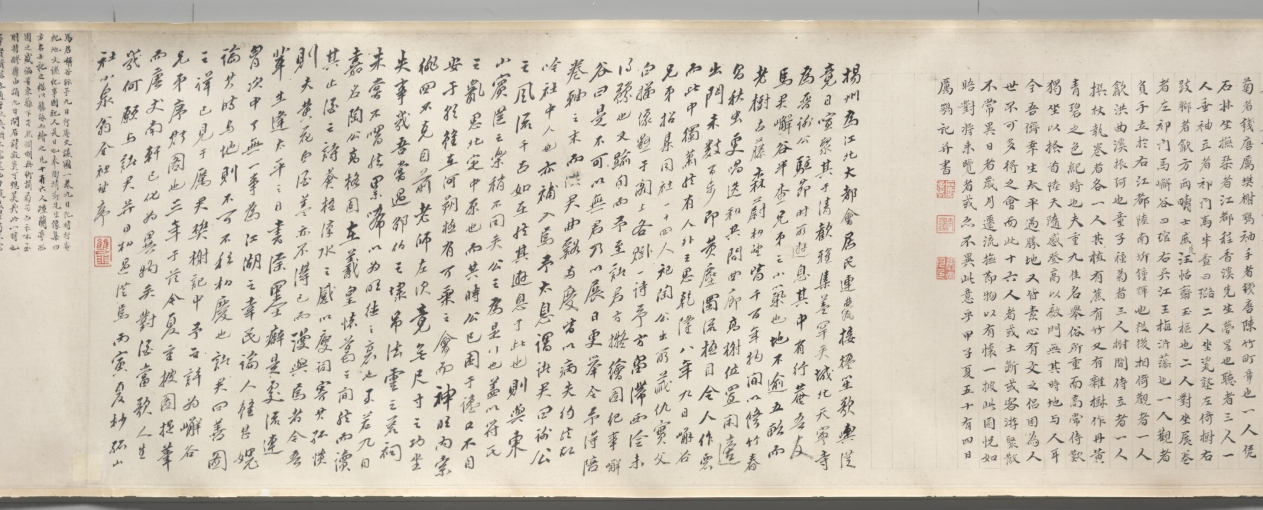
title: The Ninth Day Literary Gathering at Xing’an [Temporary Retreat]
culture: China, Qing dynasty (1644-1911)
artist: Fang Shishu (Chinese, 1693–1751)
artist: and Ye Fanglin (Chinese, active late 1600s–mid-1700s)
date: 1743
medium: Handscroll; ink and color on silk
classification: Painting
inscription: Fang Shishu's seal at beginning of painting: Ou ran shi de 偶然拾得. Ye Fanglin's seal at end of painting: Fanglin 芳林. Frontispiece title dated 1743 and 3 seals of Chen Bangyan 陳邦彦 (1678-1752).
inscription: 行庵在揚州北郭天寧寺西隅，馬君嶰谷半槎兄弟購僧房隙地所築，以為游息之處也。寺為晉謝太傅別墅。西隅饒古木，䨴鬱陰森，入林最僻，不知其近郛郭。庵居其中，無斲礱髤采之飾，惟軒庭多得清蔭，來憩者每流連而不能去。乾隆癸亥九日，積雨既收，風日清美，遂約同人，咸集於斯，中縣［懸］仇英白描陶靖節像，采黃花，酌白醪為供，乃以人世難逢開口笑，菊花雖插滿頭歸分韻賦詩。陶陶衎衎，觴詠竟日。既逾月，吳中寫真葉君敬［震］初適來，群貌小像，合為一卷，方君環山補景，命曰九日行庵文讌圖。裝池成，將各書所作於後，而囑鶚為之記。記按圖中共坐短榻者二人：右箕踞者，為武陵胡復齋先生期恆；左抱膝者，為天門唐南軒先生建中也。坐繩床者二人：中手牋者，歙方環山士庶；左仰首如欲語者，江都閔玉井華也。一人坐藤塾捻髭者，鄞全謝山祖望也。一人倚石坐若凝思者，臨潼張漁川四科也。樹下二人：離立把菊者，錢唐厲樊榭鶚；袖手者，錢唐陳竹町章也。一人憑石床坐撫琴者，江都程香溪先生夢星也。聽者三人：一人垂袖立者，祁門馬半查曰璐；二人坐瓷塾，左倚樹、右跂腳者，歙方西疇士疌 、汪恬齋玉樞也。二人對坐展卷者，左祁門馬嶰谷曰琯，右吳江王梅沂藻也。一人觀者，負手立於右，江都陸南圻鐘輝也。從後相倚觀者一人，歙洪曲溪振珂也。童子種菊者三人：樹間侍立者一人，撰杖、執卷者各一人。其植有蕉、有竹，又有雜樹，作丹黃青碧之色，紀時也。夫重九佳名，舉俗所重，而高常侍歎獨坐而搔首，陸天隨感登高以剫門，無其時地與人耳。今吾儕幸生太平，遇勝地，又皆素心有文之侶，固人世不可多得之會；而此十六人者，或土斷，或客游，聚散不常。異日者，歲月遷流，撫節物以有懷，一披此圖，悅如晤對。將來覽者，或亦不異此意乎。甲子夏五十有四日厲鴞記並書。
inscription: 揚州為江北大都會，居民連甍接楹，笙歌輿從，竟日喧聚，其於淸歌雅集，葢罕矣。城北天寧寺，為晉謝公駐節時所游息，其中有行庵，吾友馬君嶰谷、半查兄弟之小築也。地不踰五畝，而老樹古藤，森蔚相望，皆千百年物，間以修竹，春鳥秋蟲，更唱迭和，其間曲廊高榭，位置閑適。出門未數百步，即黃塵濁流極目，令人作惡。而此中獨蕭然有人外之思。乾隆八年九日，嶰谷兄弟招集同社一十四人祀陶公，出所藏仇實父白描像懸於閣上，各賦一詩。予方留滯西泠，未得預也。又踰旬而予至，諸君方擬繪圖記事，嶰谷曰：是不可無君。乃以展日更舉，令予得陪卷軸之末；而洪君曲溪，兩度皆以病失約，然故吟社中人也，亦補入焉。予太息謂諸君曰：謝公之風流，千古如在；然其游息於斯也，則與東山賓從之樂稍不同矣。公之為是行也，蓋以符氏之亂，思北定中原也。而其時公巳困於讒口，不自安於朝；雖在河朔極有可乘之會，而神明內索，徘徊不克自前。老師左次，竟無尺寸之功，坐失事幾。吾常過邵伯之埭，吊法雲之荒祠，未嘗不喟然累啼，以為明德之衰也。至若九日嘉名，陶公高格，固在羲皇懷葛之間；然而讀其 止酒之詩，蒼梧漢水之感，以瘦詞寄其孤憤則夫黃花白酒，蓋亦不得巳而漫與焉者。今吾輩生逢太平之日，書淫墨癖，是處留連，胸次中了無一事，為江湖之幸民，論人雖甚媿，論其時與地，則不可不私相慶也。諸君曰：善。圖之詳巳見於厲君樊榭記中。予之許為嶰谷兄弟序斯圖也，三年於茲；今夏重披圖捉筆，而唐丈南軒，巳化為異物矣。對酒當歌，人生幾何，願與諸君並日相遇從焉。丙寅夏杪孤山社小泉翁全祖望序。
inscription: 6 additional colophons and 15 additional seals: 1 colophon, dated 1746, and 1 seal of Huang Zhijun 黃之雋 (1668-after 1746); 1 colophon and 2 seals of Zha Xiang 查祥 (1718 jinshi); 1 colophon, dated 1746, and 3 seals of Zhang Siwen 張思問; 1 colophon, dated 1748, and 4 seals of Shao Dong 卲東 (1721 jinshi); 1 colophon, dated 1753, and 2 seals of Fang Shiju 方世舉 (signing as Fang Funan 方扶南); 1 colophon, dated 1808, of Ruan Yuan 阮元 (1764–1849); 3 seals unidentified.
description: By the 1700s, Yangzhou was flourishing both economically and culturally as the most prosperous city in China, having surpassed all other Jiangnan cities in their creation of gardens. This group portrait commemorates a literary gathering in the private garden of the salt merchants and art patrons Ma Yueguan (1688–1755) and his brother Ma Yuelu (1697–after 1766) in Yangzhou. Ma Yueguan received imperial recognition for providing financial aid and food relief for those affected by flood and drought. Ma Yueguan is seen seated at the end of the painting holding an open scroll while Ma Yuelu stands behind the qin instrument player. Among the guests were officials, scholars, poets, painters, and merchants, a mix of local members of a poetry club reflecting increasing social diversity.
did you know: The two hosts and their fourteen guests were all officials, scholars, poets, painters, and salt merchants.